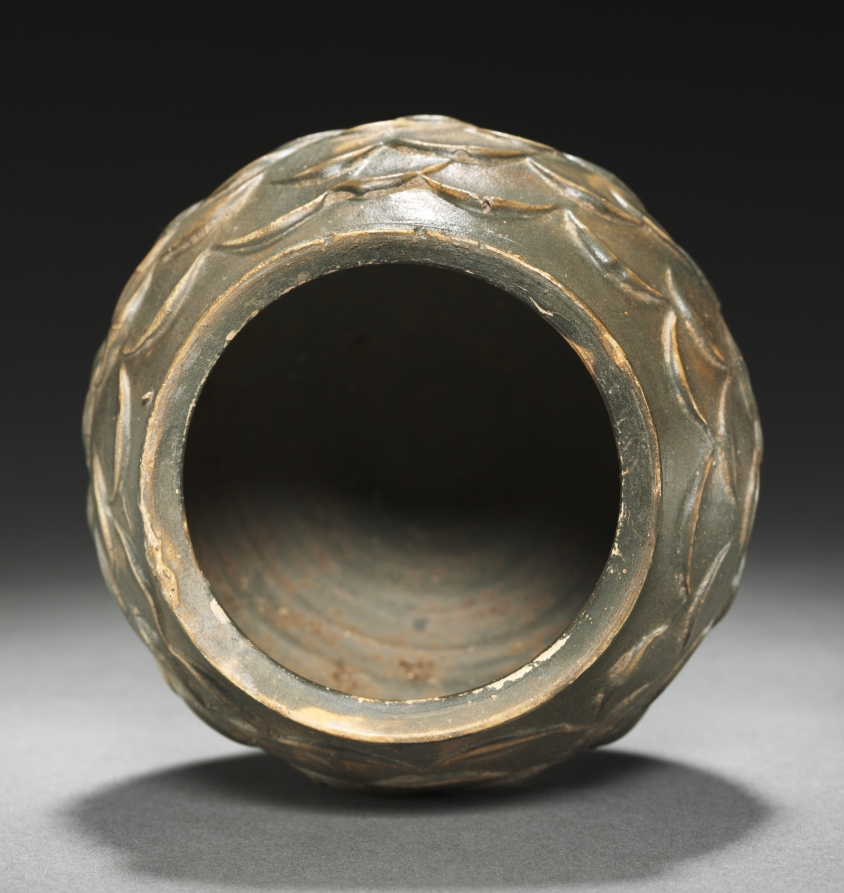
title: Beaker with Scale Pattern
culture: Rhenish (Cologne), Gallo-Roman, 1st Century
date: 1–100 CE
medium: reddish ware with dark gray burnished slip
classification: Ceramic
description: The dark brown glaze on the exterior of this beaker is patchy and irregular, allowing the light red clay beneath to show through. The glaze is especially light on the ridges of the raised scales that decorate the upper body of the vessel, arranged in four offset rows. The pattern was created by applying thick clay slip to the surface of the beaker after it was removed from the potter’s wheel.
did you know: Several textile fibers were found inside this beaker, suggesting that it may have contained an object or objects wrapped in cloth when it was buried.